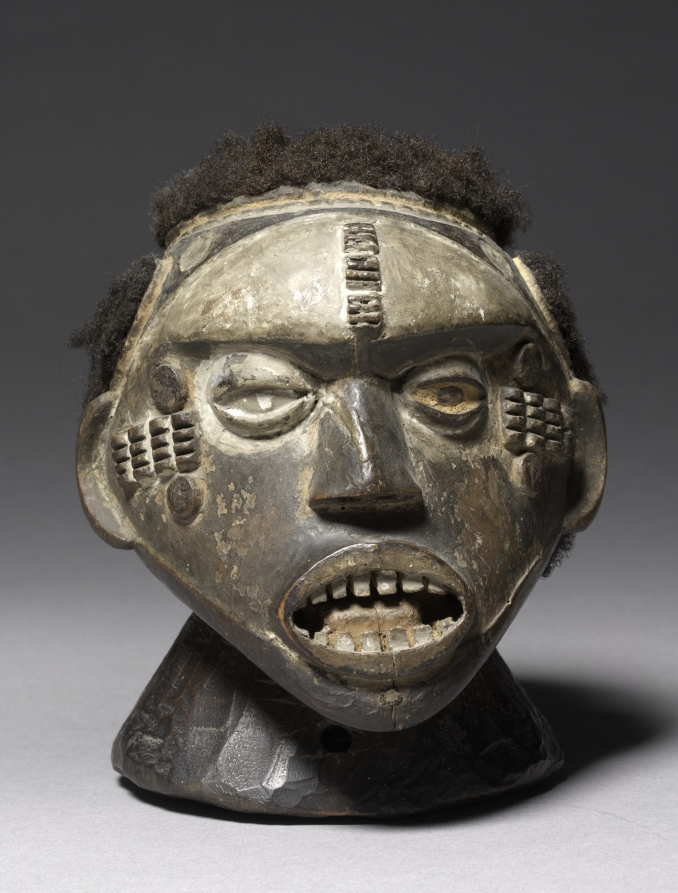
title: Headdress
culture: Africa, West Africa, Nigeria, Idoma-style carver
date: early 1900s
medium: Wood, human hair, paint, and possibly kaolin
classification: Mask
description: This was used in masked performances of the Agrinya society, a powerful guild formerly restricted to men who had killed an elephant, lion, or man. The white pigment connotes the realm of the ancestors, while the aggressive expression of the face seems to suggest the courage of Agrinya society members.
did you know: Holes in the neck once attached a flat raffia disk or strings for wearing the headdress-type mask on top of the head.